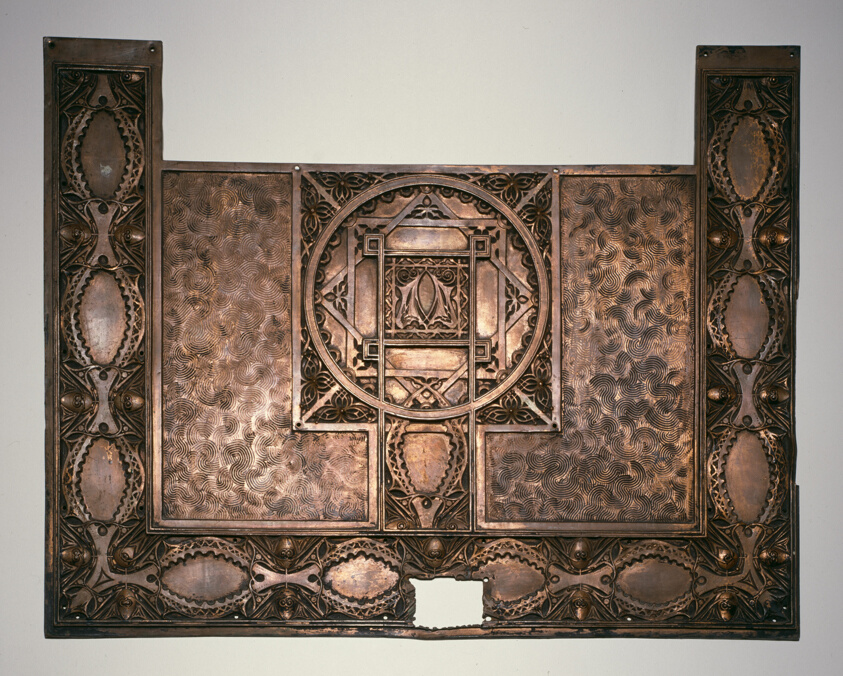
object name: Architectural fragment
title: Chicago Stock Exchange Building: Kick Plate from Front Entrance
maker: Louis H. Sullivan (American, 1856-1924)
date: 1894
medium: Copper-plated bronze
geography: United States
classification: metal; architectural fragment; architecture